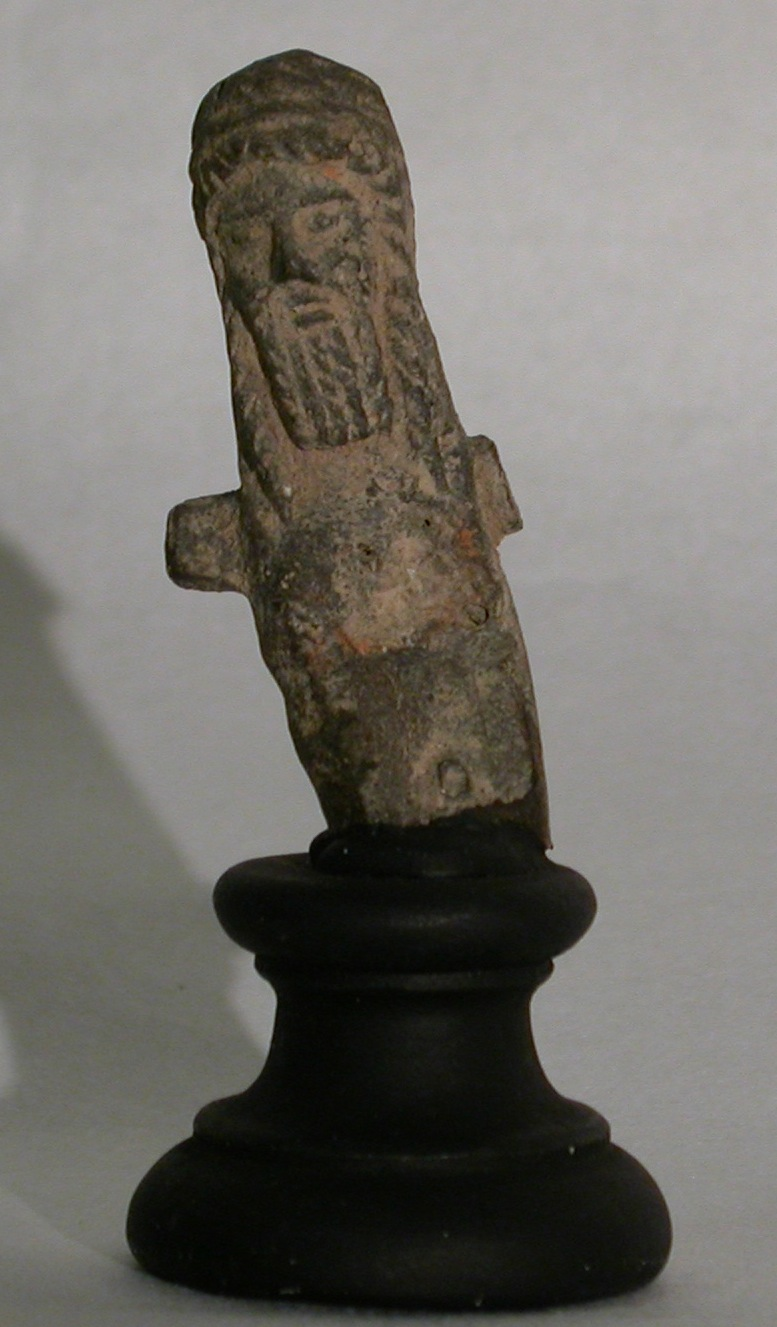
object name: Sculpture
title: Fragment of a Herm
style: greek, ancient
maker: Greek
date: 3rd-2nd century BCE ?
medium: terracotta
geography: Greece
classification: earthenware; ceramics; sculpture; ancient art